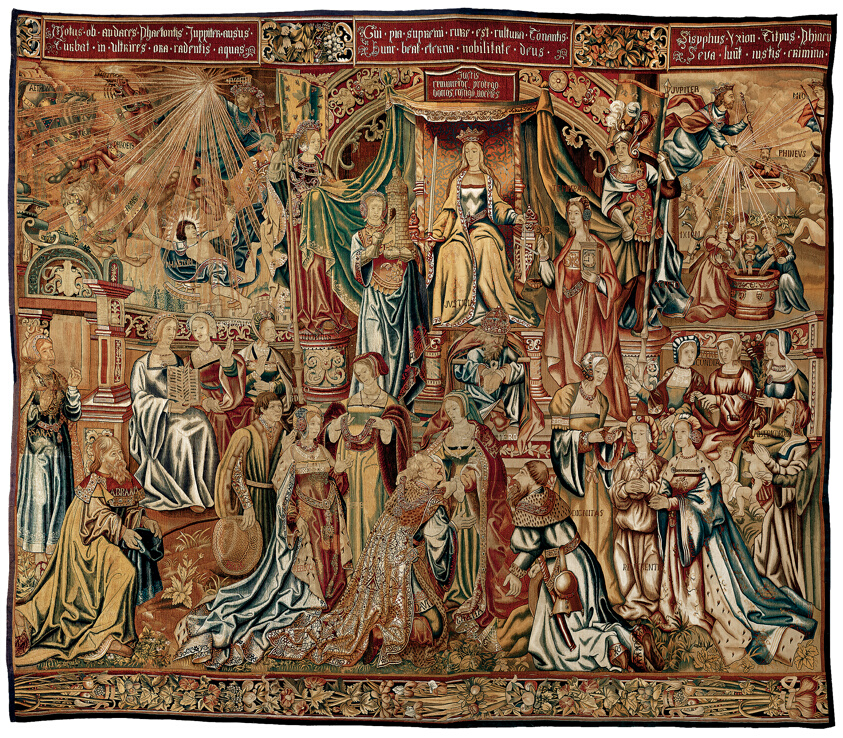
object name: Textile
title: Justitia (Justice) from Los Honores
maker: Presumably after a design by Bernard van Orley (Netherlandish, c. 1492-1542) and unidentified artists; Possibly produced at the workshop of Pieter van Aelst (c. 1450–1533; top left corner); produced at an unknown workshop (remaining sections); Brussels (top left corner and center of lower section); Belgium or France, 1905/08 (remaining sections)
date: 1525/32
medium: Wool and silk, slit and dovetailed tapestry weave. Warp: Count: 6 warps per cm; wool: S-ply of three Z-spun elements; diameters: 0.4–0.7 mm Weft: Count: varies from 16 to 38 wefts per cm; wool: S-ply of two Z-spun elements; pairs of S-ply of two Z-spun elements; paired yarns of S-ply of two Z-spun elements and a single Z-spun element; diameters: 0.4–1.5 mm; silk: S-ply of two Z-twisted elements (may be replacement wefts); diameters: 0.4–1.0 mm; wool and silk; paired yarns of S-ply of two Z-spun wool elements and S-ply of two Z-twisted silk elements; diameters: 1.0–1.4 mm. Three-quarters of piece rewoven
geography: Brussels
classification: weaving - tapestry; textile